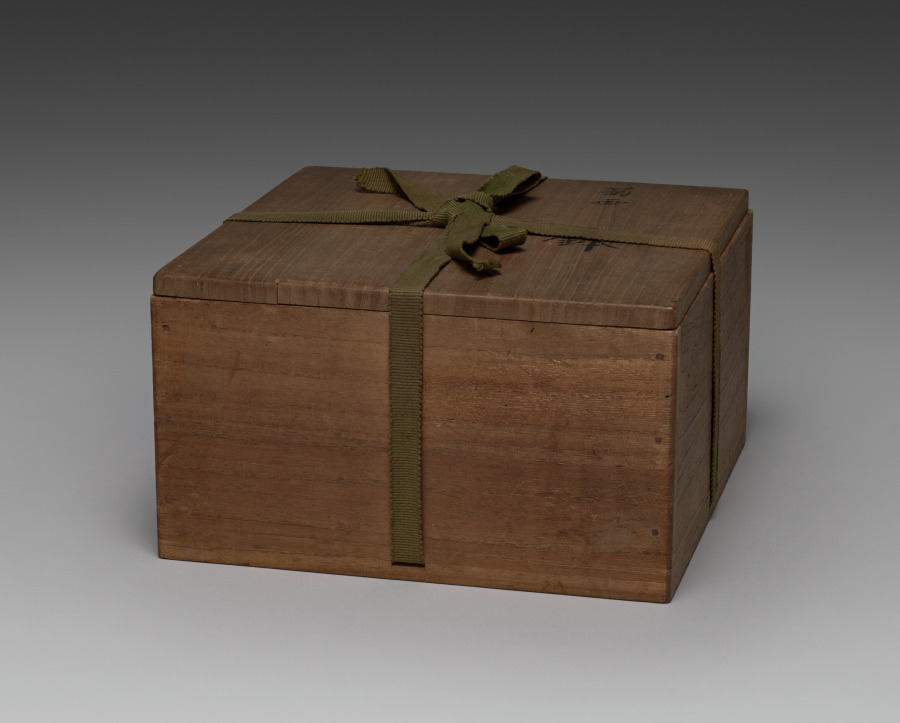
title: Bowl with Chrysanthemums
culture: Japan, Taishō period (1912–26) or Shōwa period (1926–89)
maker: Seifū Yohei IV (Japanese, 1872–1951)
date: 1914–46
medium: Stoneware with underglaze iron oxide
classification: Ceramic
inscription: 清風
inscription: 菊画/ 鉢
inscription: The inside of the box lid has a seal indicating that the bowl was included in a renewal opening of the gallery Manjudo in Tokyo.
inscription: 清風造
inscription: 成山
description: The chrysanthemums in underglaze iron oxide of this bowl of Kyoto ware have a casual feel, which is emphasized by the bowl's shape. When held, the its slightly ridged body would gently massage one’s palms, contributing to the sensory, tactile experience of the piece and possibly generating a sense of comfort and ease. The inside of the box lid has a seal indicating that the bowl was included in a renewal opening of the gallery Manjudo in Tokyo.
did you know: Stoneware works of this type are classified as Kyoto ware, after the city where the style developed.